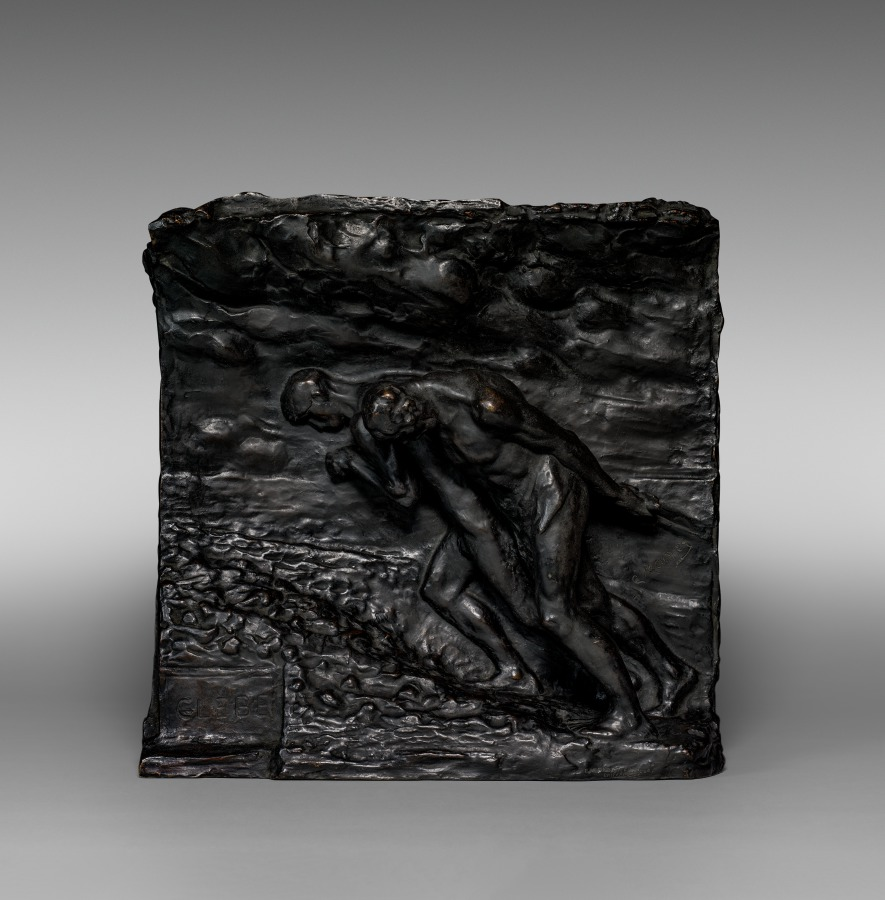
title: The Soil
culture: Belgium, 19th century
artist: Constantin Meunier (Belgian, 1831–1905)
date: c. 1890 – 1900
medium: bronze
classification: Sculpture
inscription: Signed right: "C. Meunier"; inscribed lower right front: "B. Verbeyot, Fondeur, Bruxelles."; lower left: "GLEBE"